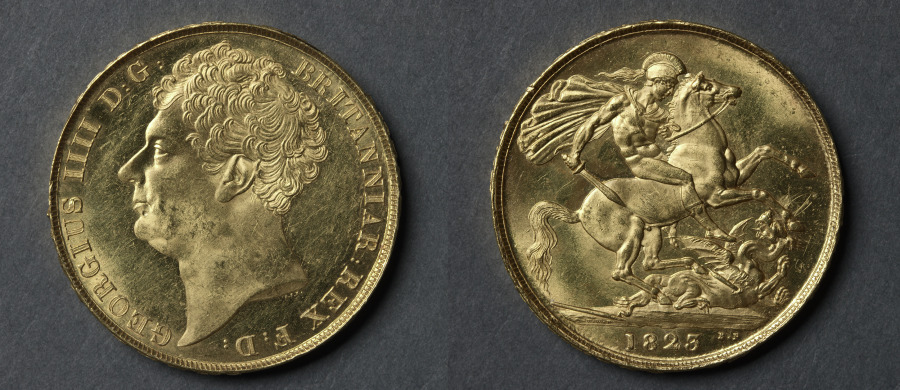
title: Two Pound Piece: George IV (obverse); St. George and the Dragon (reverse)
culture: England, George IV, 1820-1830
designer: after Benedetto Pistrucci (Italian, 1784–1855)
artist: after a design by Francis Legatt Chantrey (British, 1781–1841)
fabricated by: Jean Baptiste Merlen (French, 1769–1850)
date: 1823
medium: gold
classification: Coins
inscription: BRITANNIAR: REX F: D: GEORGIUS IIII D: G:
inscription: 1895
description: During the reign of King George IV, two-pound pieces were struck for circulation in 1823 only. Pattern pieces appeared in 1824, 1825, and 1826. The king was so disgusted with the caricature of a portrait that Pistrucci placed on the first coins of the reign that the artist was ordered to model a new obverse from a bust by the sculptor Sir Francis Chantrey (1781–1841). Pistrucci refused; it was beneath his dignity to copy the work of another artist. The work was therefore carried out by J. B. Merlen, assistant engraver at the Royal Mint.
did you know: This is the only modern British coin on which the initials of the Master of the Mint, William Wellesley Pole, appear, on the reverse below the broken lance.